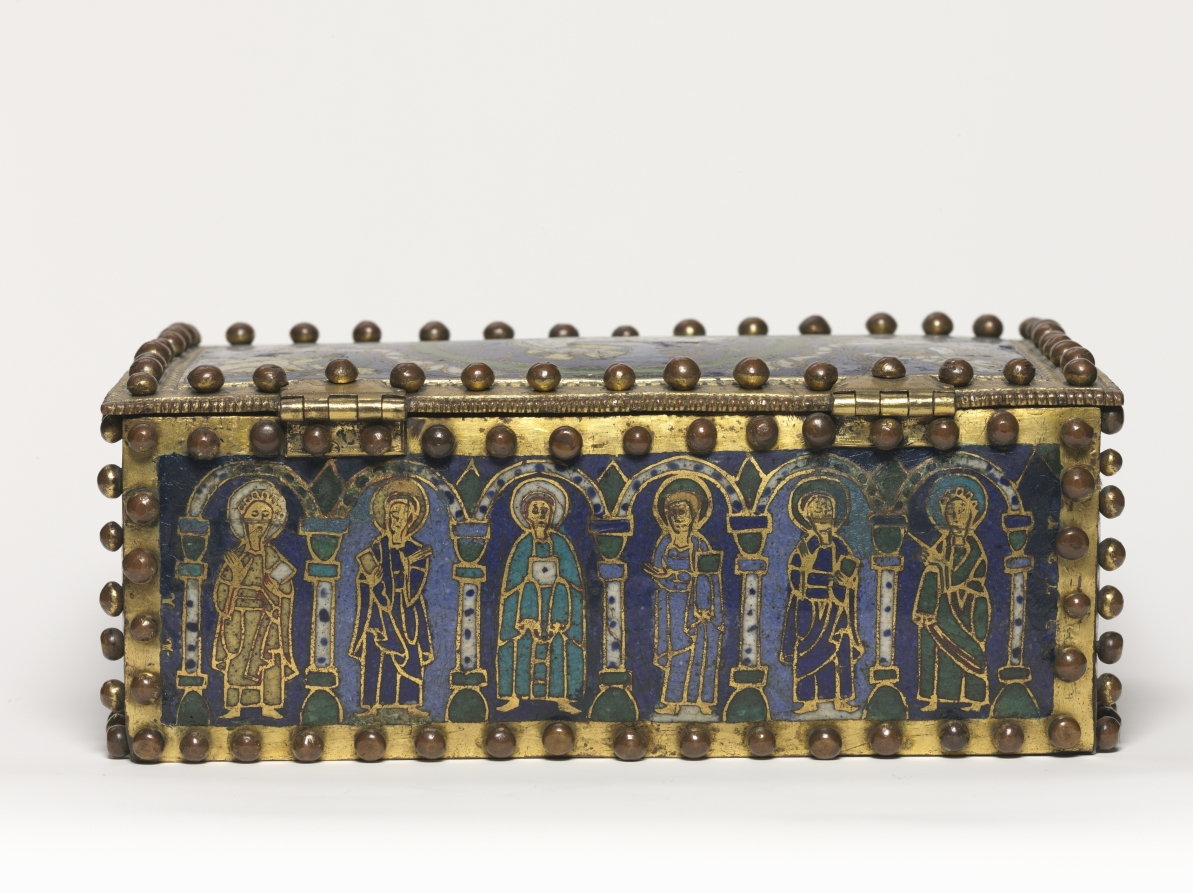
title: Casket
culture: Northern Germany?, Romanesque period, 12th century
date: 1100–1150?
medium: gilded copper, champlevé enamel, wood core (modern)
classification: Enamel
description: This champlevé enamel casket belongs to a distinct group of nine closely related objects characterized by the vivid colors of their enamel decoration and rows of spherical pins placed along the edges of each enamel plaque. Recent X-ray analysis suggests that the casket originally functioned as a stand for an altar cross. Such a function is attested to in at least three related caskets (in Copenhagen, Hildesheim, and Berlin). The casket’s iconographic program features the 12 apostles, placed under arcades (on the long sides), the Crucifixion and Christ in Majesty (on the short sides), and the Lamb of God surrounded by the symbols of the four Evangelists (on the lid).